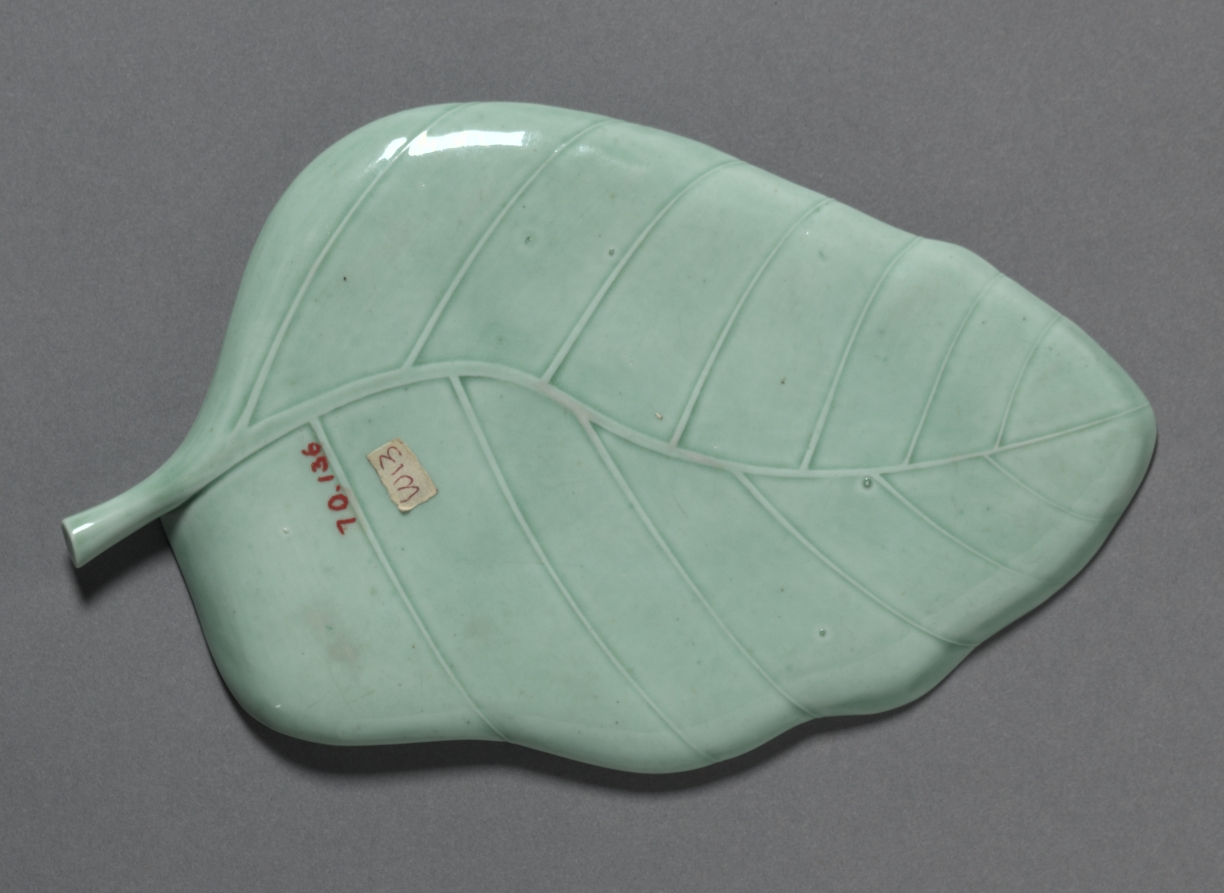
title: Brush Washer in Shape of a Leaf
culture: China, Jiangxi province, Jingdezhen, Qing dynasty (1644-1911), Yongzheng reign (1723-1735)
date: 1723–35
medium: porcelain with camellia-leaf green glaze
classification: Ceramic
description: The leaf-shaped brush washer came with a carved wooden stand that was made separately. It reflects how the object was previously used, displayed, and appreciated.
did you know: The potter detailed the edge of this plantain leaf with holes to make it appear as if a worm had snacked on it.